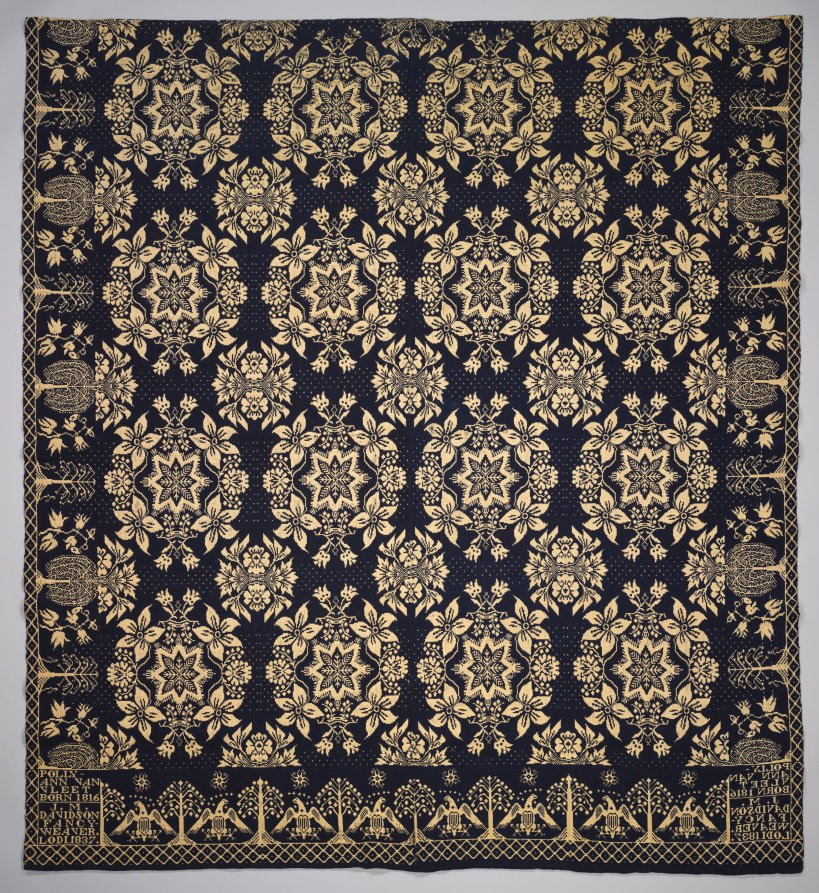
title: Coverlet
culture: America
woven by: J.M. Davidson (American)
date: 1837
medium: double weave; blue wool and white cotton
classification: Textile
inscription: Two lower corners have inwoven inscription; text in the left corner is legible, text in right corner is reversed: "POLLY - ANN VANVLEET BORN 1816 J.M. DAVIDSON FANCY - WEAVER. LODI, 1837"